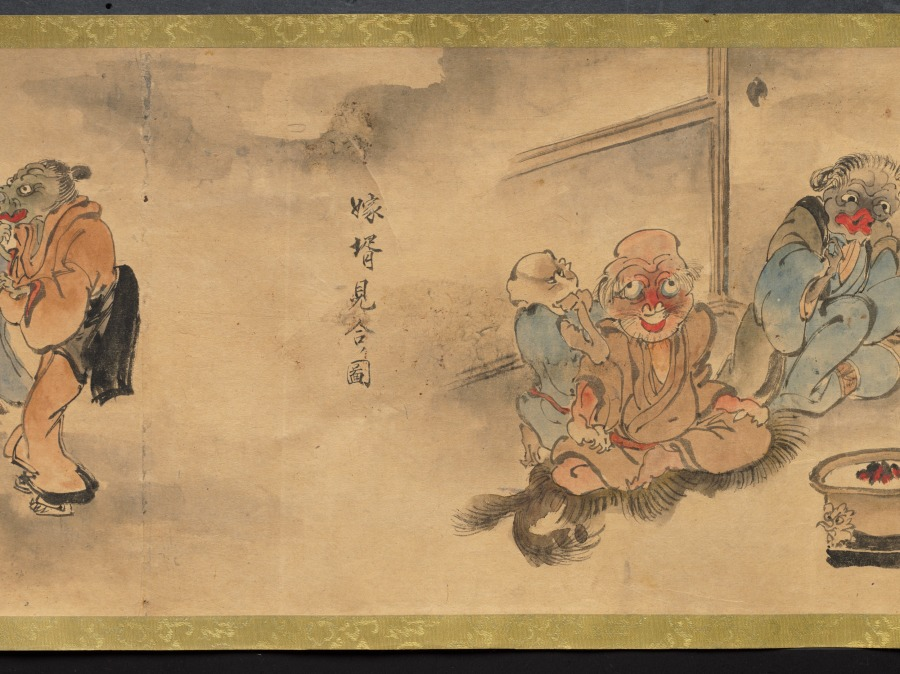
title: An Illustrated Marriage of Apparitions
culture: Japan, Edo period (1615–1868)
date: mid-1800s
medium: handscroll; ink and color on paper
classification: Painting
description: The matchmaking, engagement, wedding, and birth of the first child of two apparitions, or bakemono, literally "things that change," are illustrated in this whimsical, humorous handscroll. Japanese folklore abounds with such strange creatures, most famously represented in handscrolls featuring a procession of 100 supernatural monsters. Aside from a textual preface and cartouches indicating the content of the scenes, the tale is told visually. The artist and whereabouts of the original handscroll are unknown, but a number of other 19th-century copies by amateur painters exist in Japanese collections, attesting to its broad appeal.